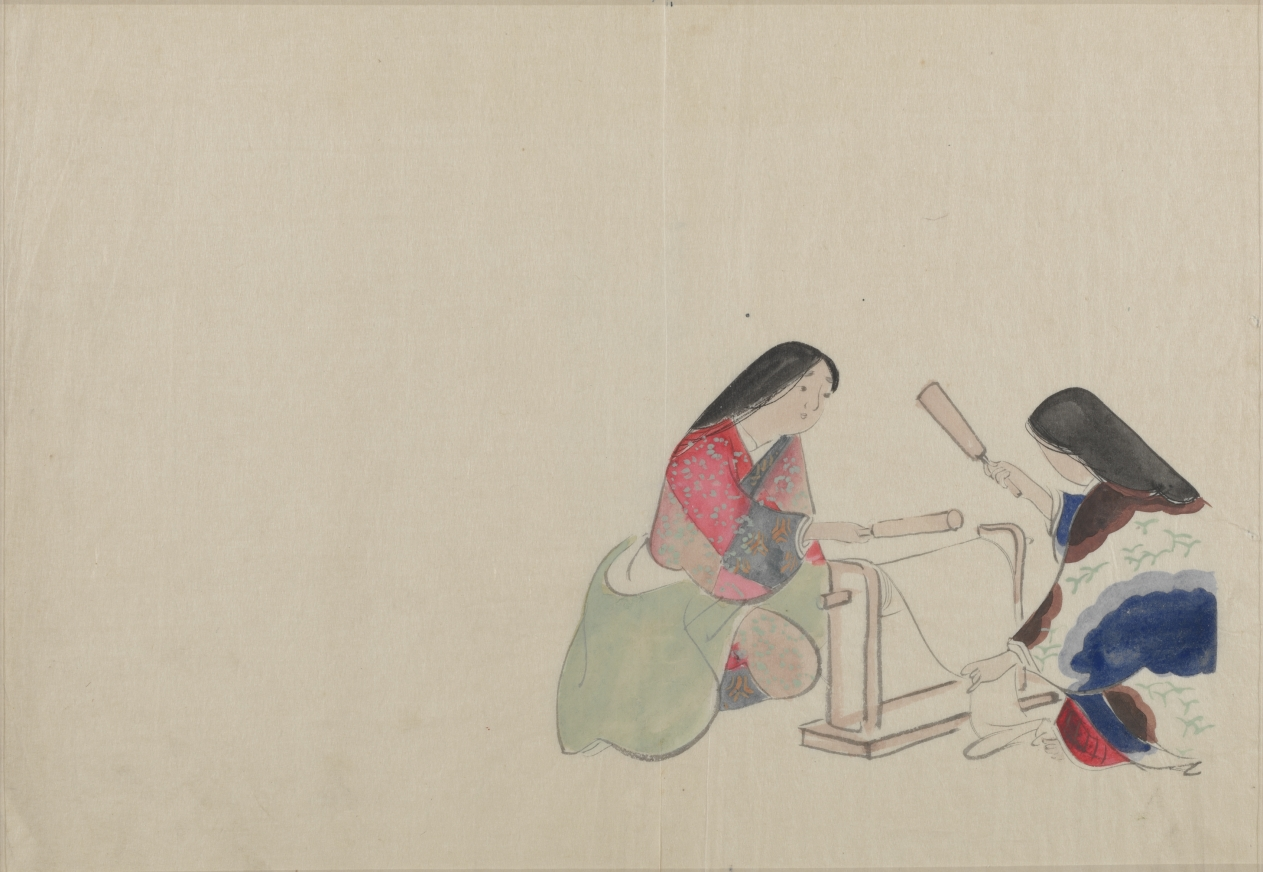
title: Flowers of a Hundred Worlds (Momoyogusa): Fulling Silk (Uchiginu)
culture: Japan, Meiji period (1868–1912)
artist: Kamisaka Sekka (Japanese, 1866–1942)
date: 1909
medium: ink and color on paper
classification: Drawing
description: Kamisaka Sekka made preparatory drawings for his Flowers of a Hundred Worlds series on tracing paper with ink and color. The freehand sketches are much looser than the finished, printed compositions.